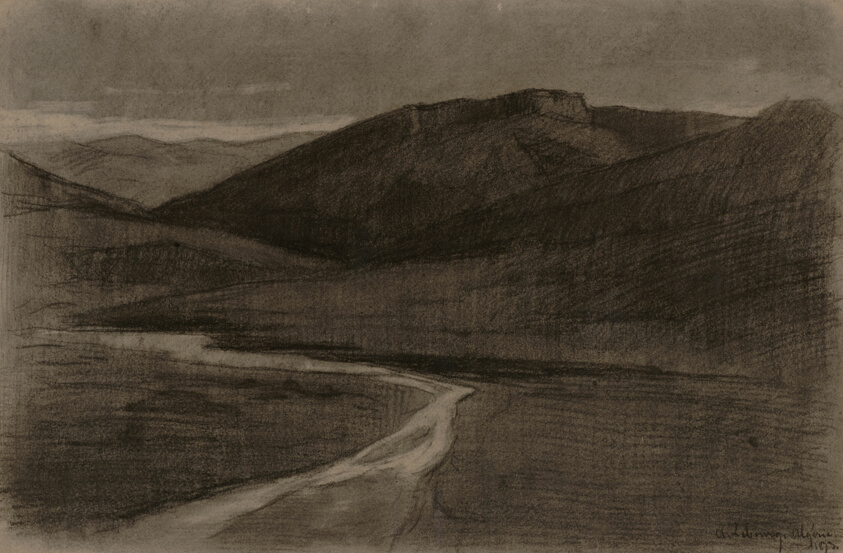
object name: Drawing and Watercolor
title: Algerian Landscape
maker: Albert-Charles Lebourg; French, 1849-1928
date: 1873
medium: Black chalk and charcoal, with stumping and erasing, on paper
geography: France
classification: chalk; drawings (visual works); prints and drawing